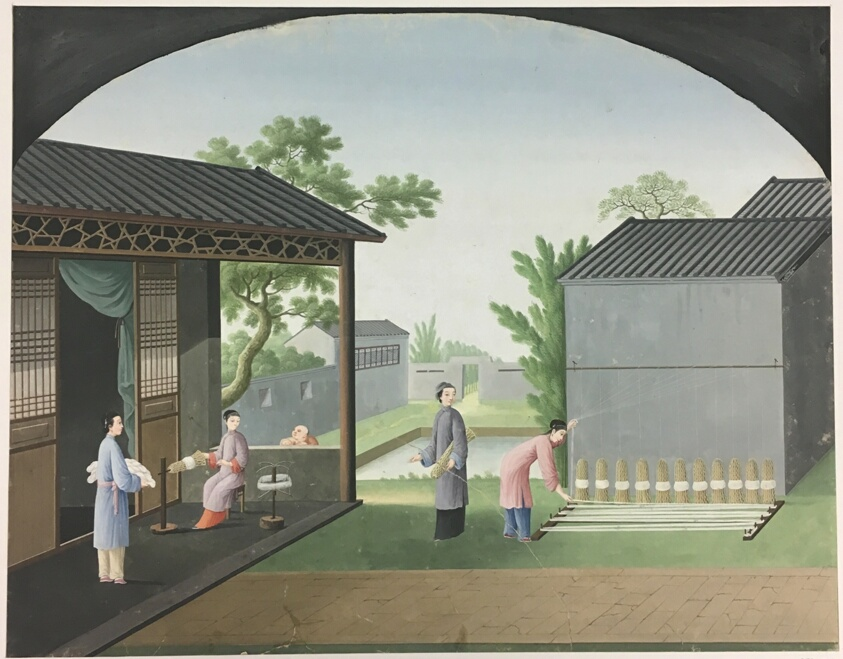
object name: Painting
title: Spinning Cloth, Preparing Tea Leaves, Preparing Silk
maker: China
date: Early 19th century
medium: Colors on paper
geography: China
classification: painting; asian art; print